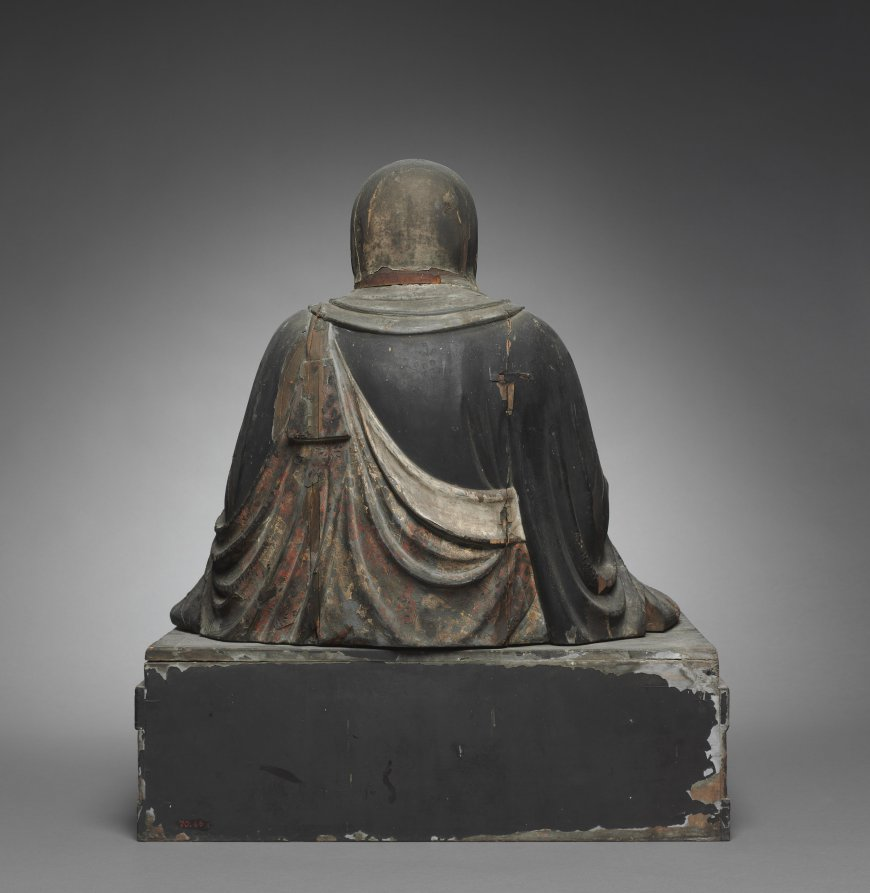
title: Portrait of the Mother of Hotto Kokushi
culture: Japan, Edo period (1615–1868)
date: 1680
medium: wood with polychromy and inlaid crystal and stone eyes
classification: Sculpture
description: This is an imaginary portrait of the mother of the Zen master Hottō Enmyō Kokushi (1203–1298), whose sculptural portrait (1970.67) can be seen in gallery 235B. That image was carved soon after the master's death. His mother's image, however, was completed several hundred years later, so the likeness is doubtful.